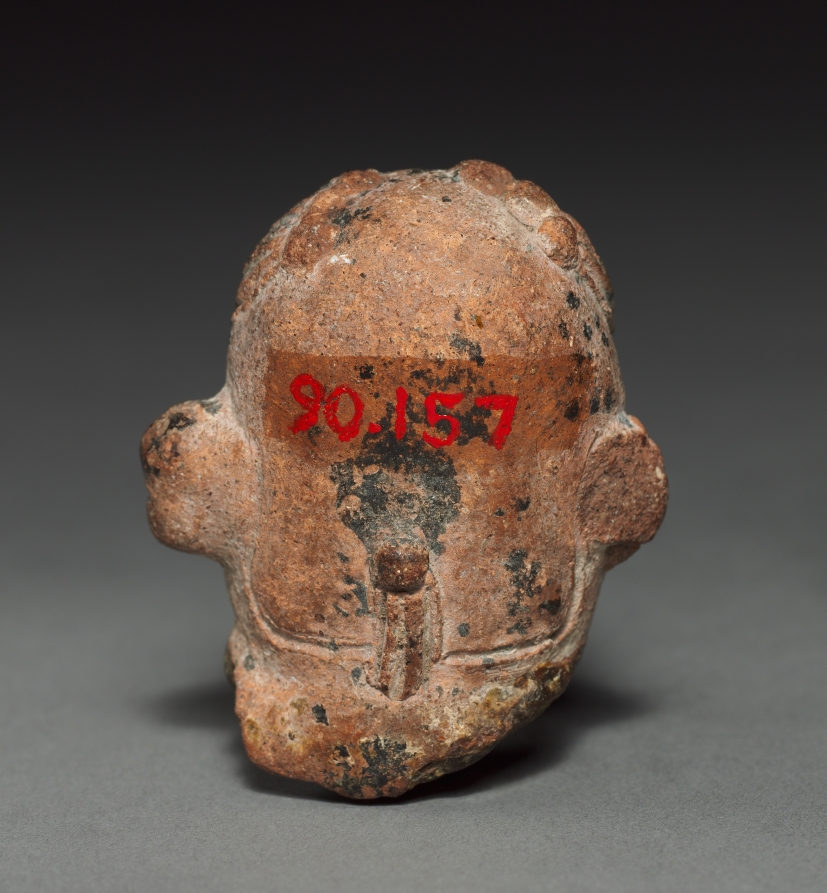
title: Figurine Head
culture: Mexico or Central America, Maya(?)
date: 100 BCE–300 CE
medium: pottery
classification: Sculpture